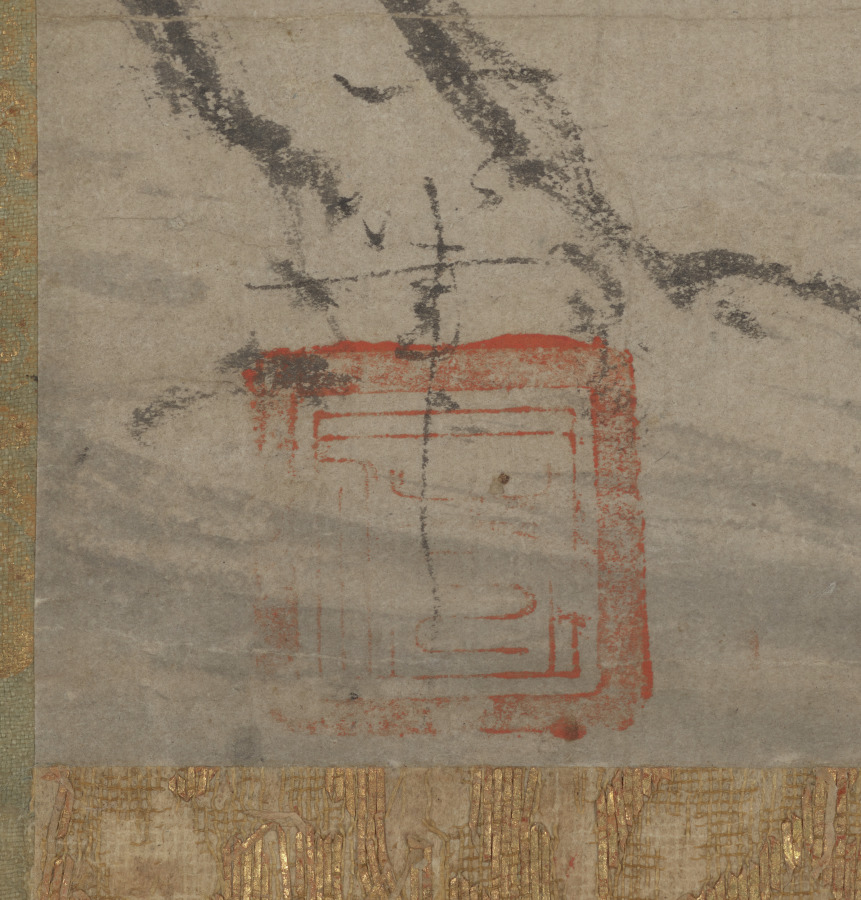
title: Listening to the Wind in the Pines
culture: Japan, Muromachi period (1392–1573)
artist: Ikkyū Sōjun (Japanese, 1394–1481)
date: 1400s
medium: hanging scroll; ink on paper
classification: Painting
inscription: 山居僧聴松風/何須臨済徳山禅一箇住山/三十年公案工夫了畢後/長松風静罷参眠 (transcribed by Trevor Menders with Zheng Xiaoying 2017, revised by Osvaldo Mercuri 2021)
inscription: 紫野龍寶門客东海純一休老和尚畫と詩一筆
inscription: 落款 一休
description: A monk sits in contemplation below an overhang covered with pine. The poem, titled "Monk in the Mountains Listening to the Wind in the Pines," refers to two Chinese Chan (Zen) Buddhist monks active in the ninth century. It may be translated as follows: Why must the Zen of Rinzai (Linji Yixuan) and Tokusan (Deshan Xuanjian) reside in a single temple for thirty years? Once he's solved his kōan, (the monk) ends his practice and falls asleep in the quietness of the wind among the tall pines. (translated by Osvaldo Mercuri) According to an inscription following the poem, both painting and verse were done by an eminent Japanese Buddhist monk known for revitalizing the Kyoto temple Daitokuji.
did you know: The word mountain, appearing in the title to the poem on this painting, can also refer to a temple.